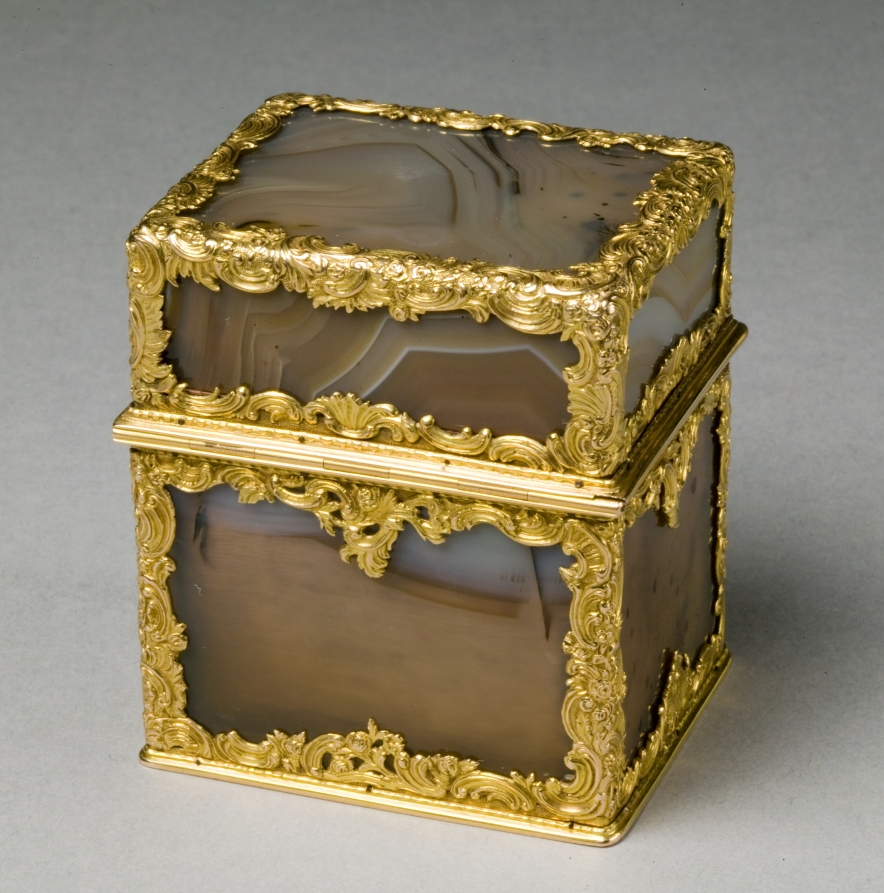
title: Writing Case (Nécessaire)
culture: England, mid 18th century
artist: attributed to James Cox (British)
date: c. 1760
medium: agate, gold and diamond. mounted with 18 KT gold cagework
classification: Miscellaneous